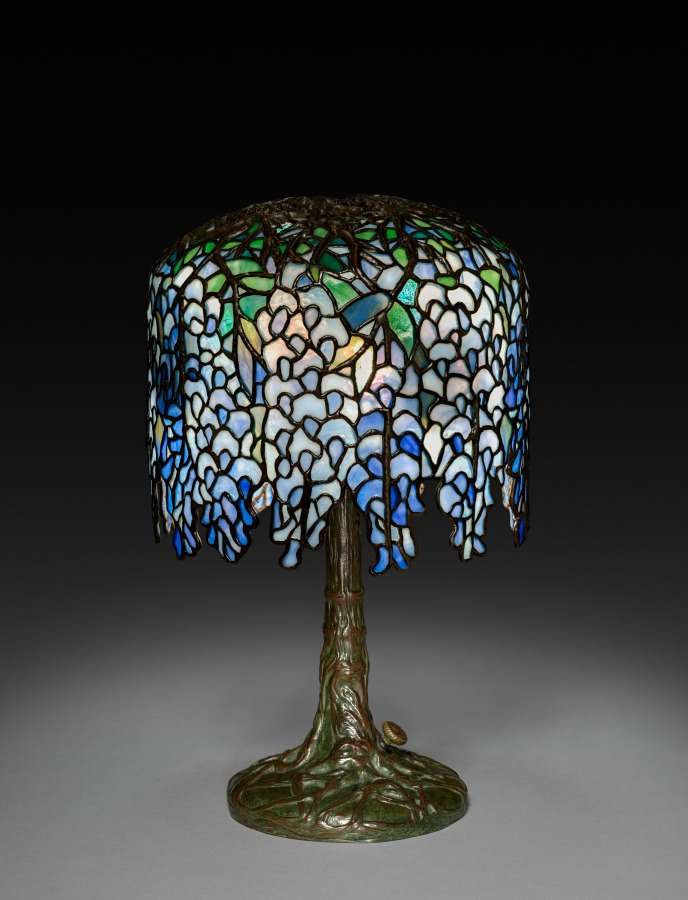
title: "Pony" Wisteria Lamp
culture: America, New York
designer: Clara Wolcott Driscoll (American, 1861–1944)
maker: Tiffany Studios (United States, New York, 1902–32)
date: c. 1902–10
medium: leaded glass, bronze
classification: Lamp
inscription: Base impressed: TIFFANY STUDIOS/NEW YORK/7002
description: The dawn of the 20th century spurred fresh approaches to design. Louis Comfort Tiffany’s great contribution to this new art movement, termed the Art Nouveau, was not only the shimmering iridescence of his Favrile glass but also the naturalistic compositions of his lamps and windows, which brought him commercial and critical success in both Europe and America. The artistic blend of sculpture and function in the Wisteria lamp, in which the base rises up to form the branches of the vine, became a hallmark of Tiffany's Art Nouveau production. This lamp, designed by Clara Wolcott Driscoll, Tiffany's chief lamp designer, won a grand prize for Tiffany Studios at the 1902 international exposition in Turin, Italy.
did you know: This small version of the Wisteria Lamp was called a "pony" by Tiffany and his artisans.